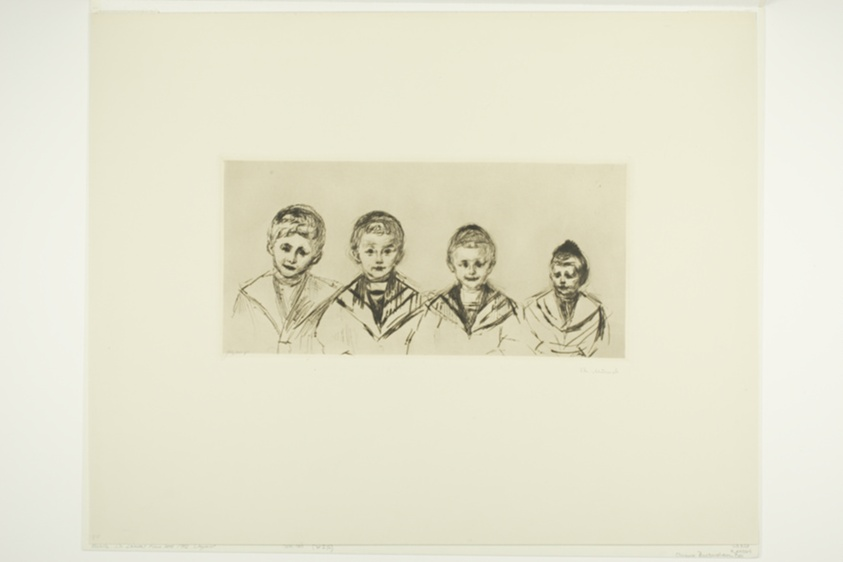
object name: Print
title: Dr. Linde's Four Sons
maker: Edvard Munch (Norwegian, 1863-1944); printed by Otto Felsing (German, born 1854)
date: 1902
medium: Drypoint on buff wove paper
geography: Norway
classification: drypoint; print; prints and drawing